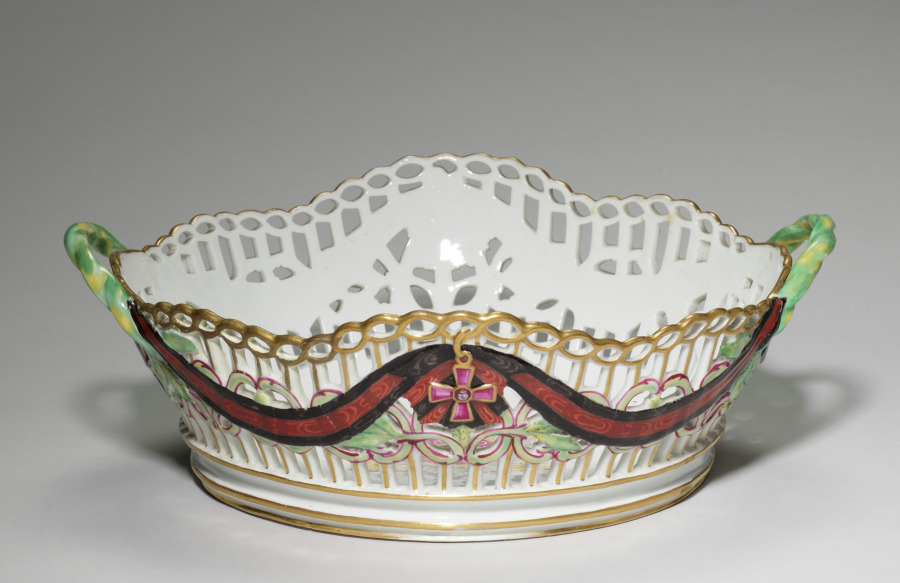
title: Fruit Basket (Corbeille)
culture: Russia, Moscow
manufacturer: Gardner Factory (Russian)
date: c. 1783–85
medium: porcelain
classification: Ceramic